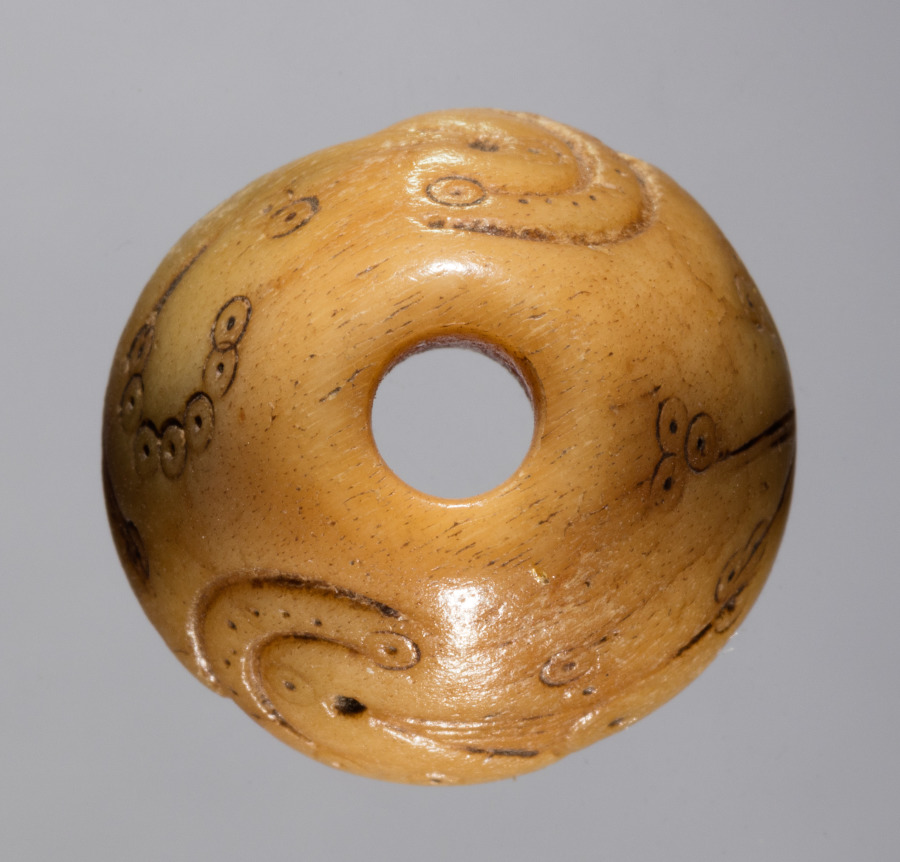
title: Spindle Whorl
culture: Iran, early Islamic period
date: 700s - 900s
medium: bone, incised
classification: Spindle Whorl